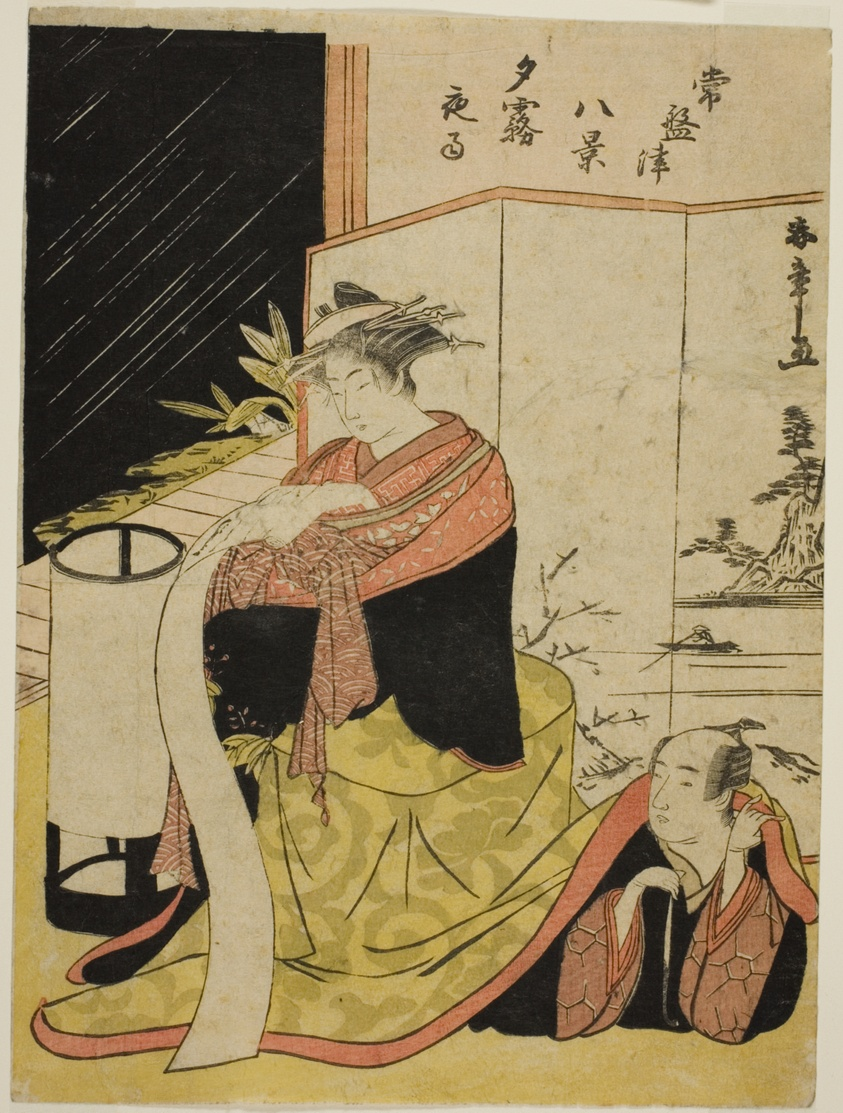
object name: Print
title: The Courtesan Yugiri and Her Lover Fujiya Izaemon, from the series "Tokiwazu Hakkei"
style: Japanese (culture or style)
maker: Katsukawa Shunsho 勝川 春章; Japanese, 1726-1792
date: mid–1780s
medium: Color woodblock print; chuban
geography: Japan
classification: woodblock print; print; asian art